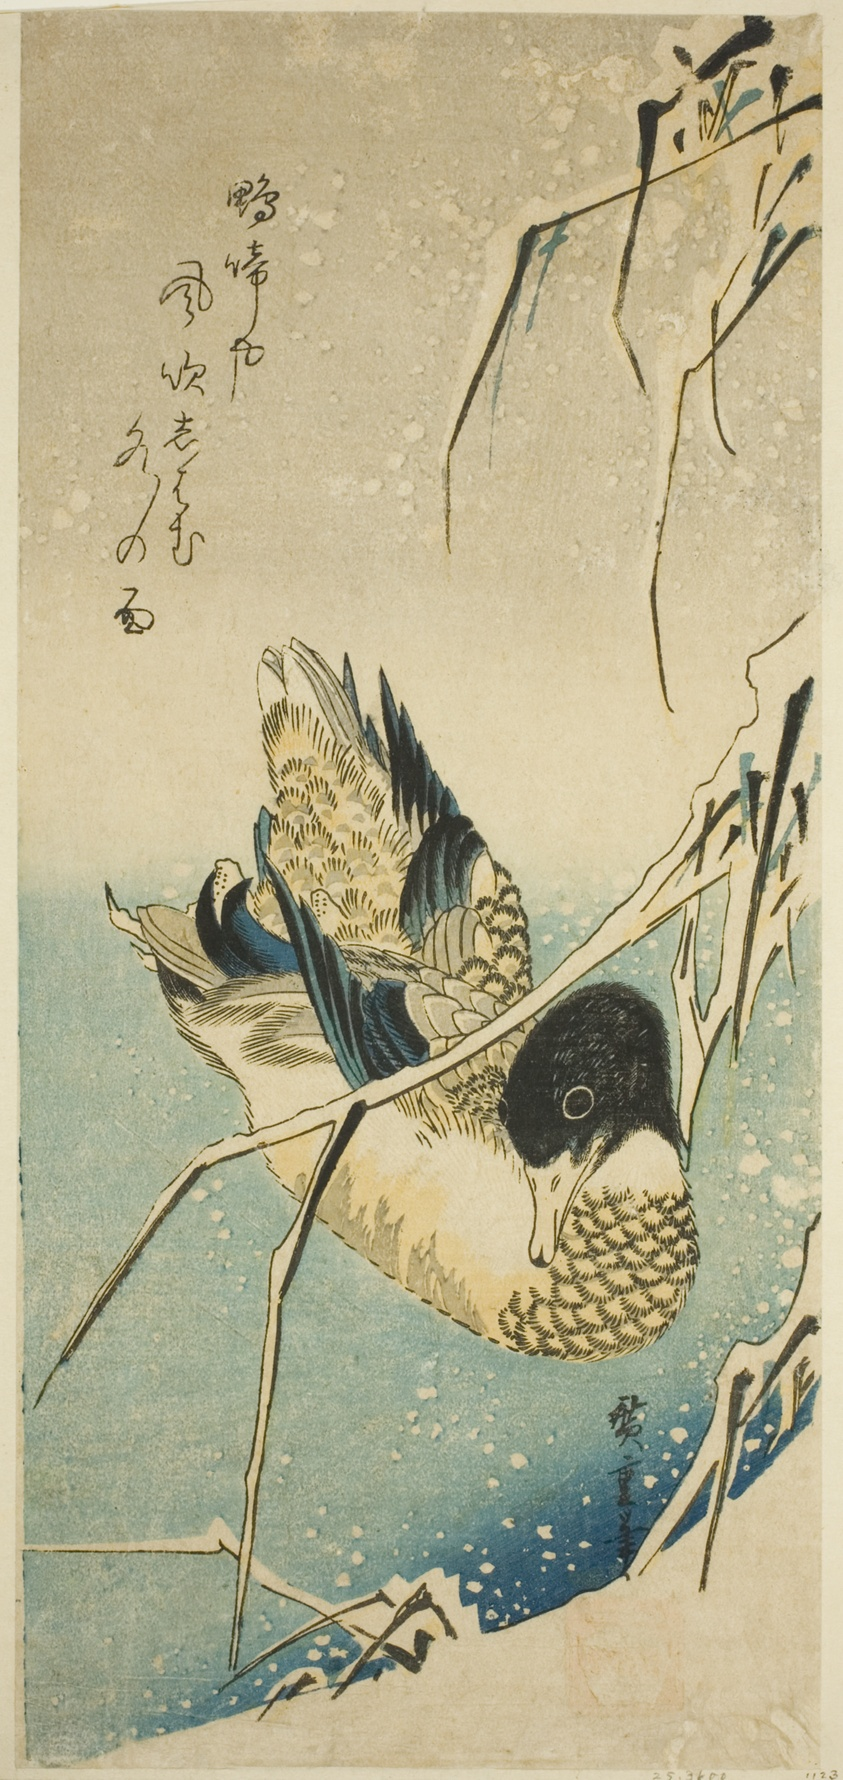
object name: Print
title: Ducks in snow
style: Japanese (culture or style)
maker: Utagawa Hiroshige 歌川 広重; Japanese, 1797-1858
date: 1830s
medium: Color woodblock print; otanzaku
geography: Japan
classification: woodblock print; print; asian art